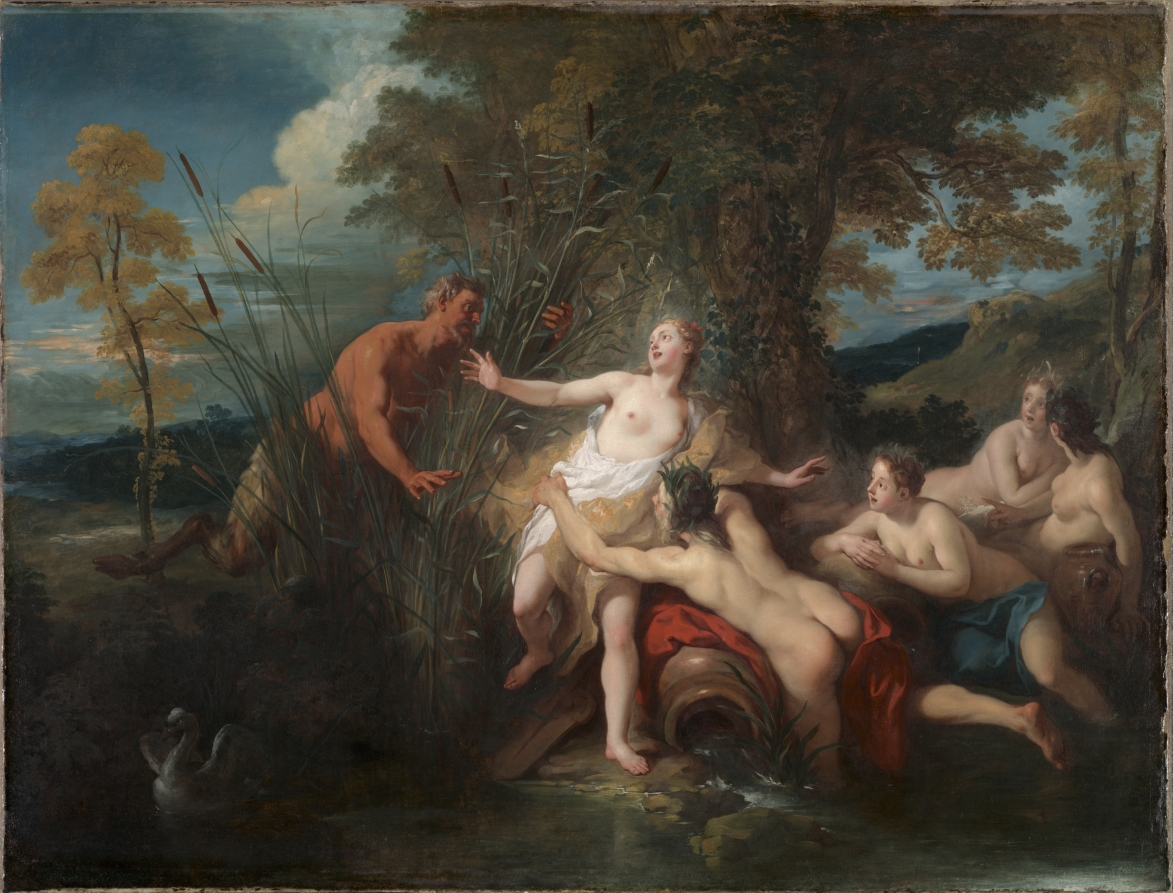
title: Pan and Syrinx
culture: France, 18th century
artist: Jean François de Troy (French, 1679–1752)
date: 1720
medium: oil on canvas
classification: Painting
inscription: Signed lower center: "De Troy 1720"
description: Subjects drawn from classical mythology posed a challenge for painters: they demanded skill in depicting the human body in complex poses, as well as knowledge of ancient texts and an ability to interpret them imaginatively. Jean François de Troy’s rich colors and voluptuous figure types were ideal for depicting the sorts of mythological subjects favored by his elite patrons, which generally focused on themes of love. In a myth recounted in the Roman poet Ovid’s Metamorphoses, the nymph Syrinx fled from the lecherous advances of the god Pan. Trapped at the edge of a river, she begged for a way to escape, and the gods transformed her into reeds. Pan later gathered these reeds to form the pan pipes, the musical instrument forever associated with him.